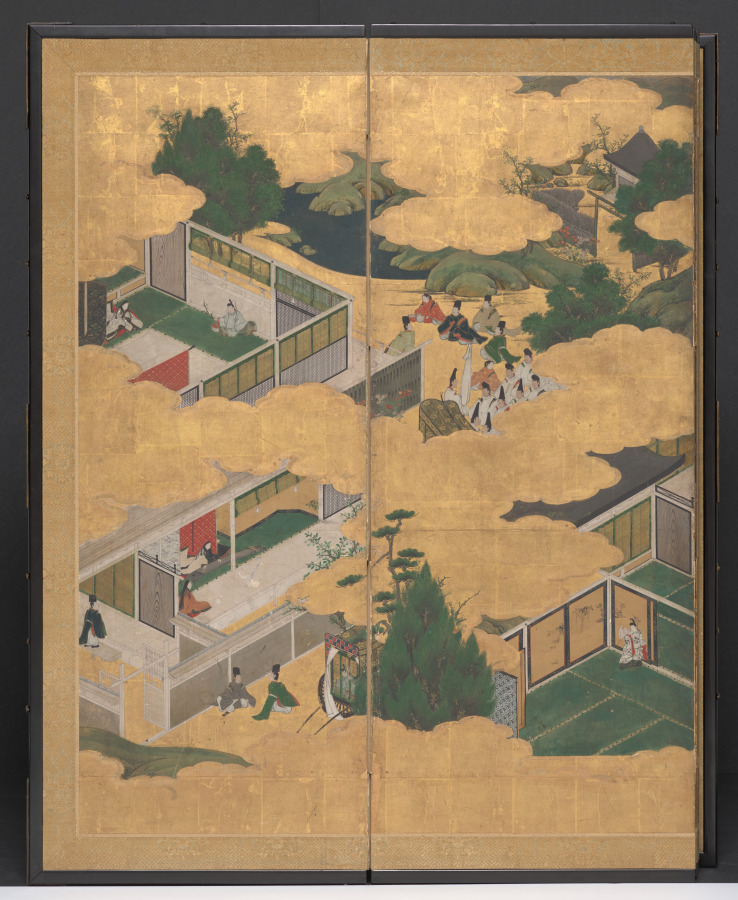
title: Scenes from the Tale of Genji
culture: Japan, Edo period (1615–1868)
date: 1700s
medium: Six-panel folding screen; ink, color, gold and gilding on paper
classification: Painting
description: Folding screens served as temporary dividers in traditional Japanese open-plan architectural spaces. This screen was inspired by Japan’s most celebrated work of literature, the Tale of Genji, written by Murasaki Shikibu, an attendant to the empress in the early 11th-century imperial court. The novel follows the love life of the “Shining Prince” Genji and delves into the psychological states of his many companions.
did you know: Distinct episodes are nestled within a matrix of golden clouds and landscape elements.